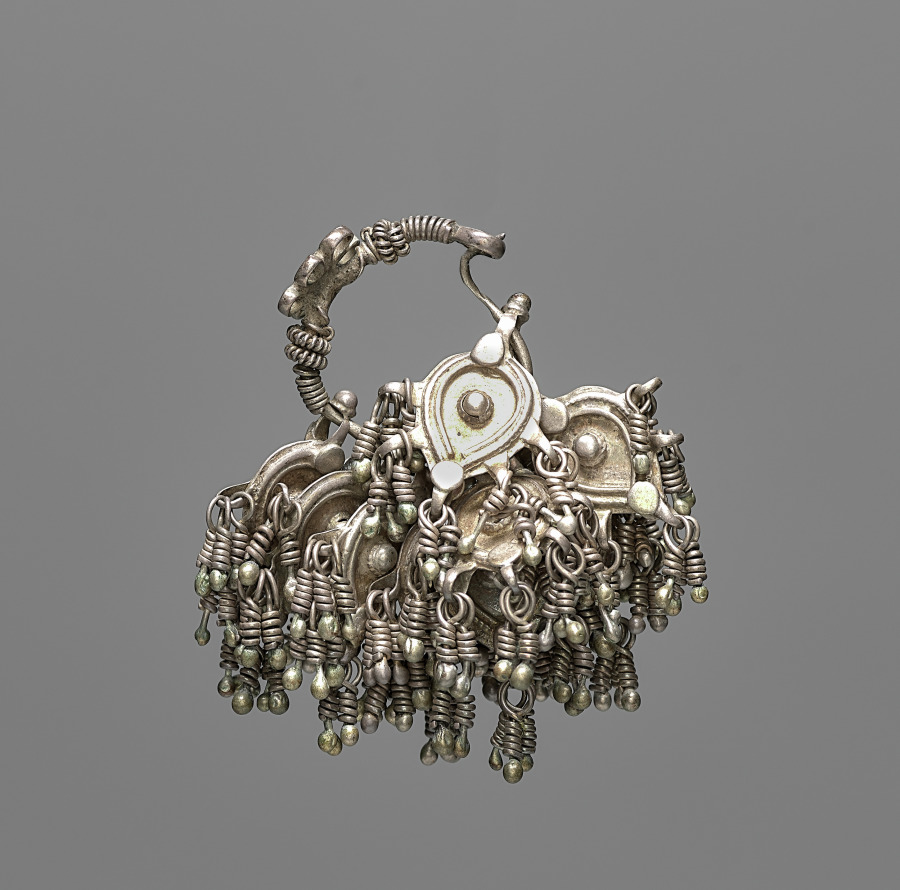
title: Earrings (?)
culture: India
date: 1800s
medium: silver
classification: Jewelry